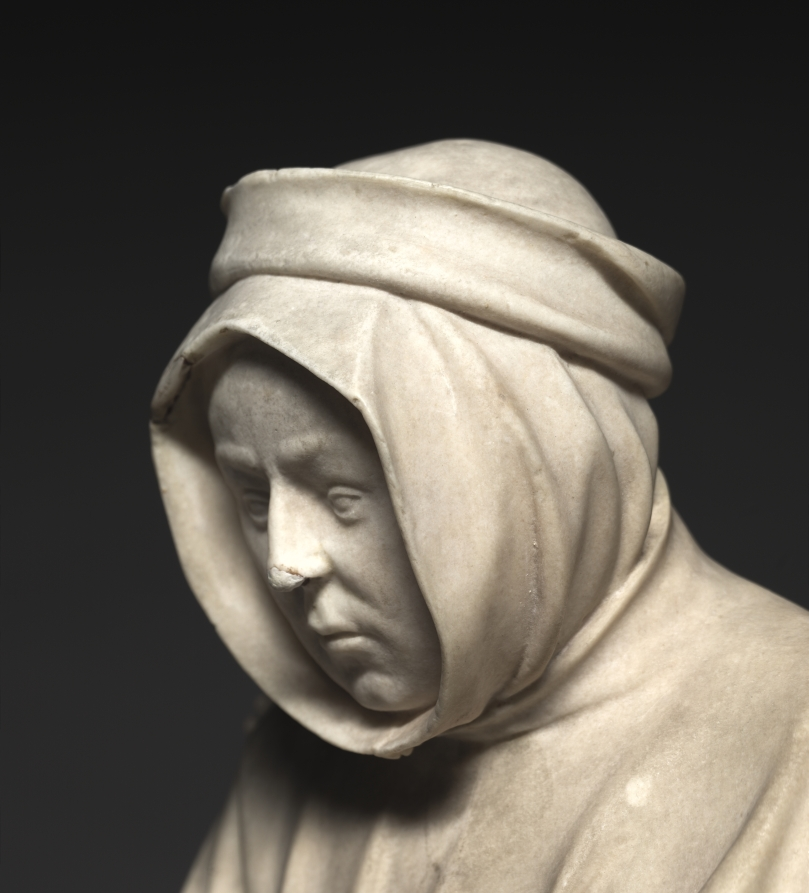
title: Mourner from the Tomb of Philip the Bold, Duke of Burgundy (1364–1404)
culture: Netherlands, active Dijon, 15th century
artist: Claus de Werve (Netherlandish, 1380–1439)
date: 1404–1410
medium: vizille alabaster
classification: Sculpture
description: This figure comes from the tomb of Duke Philip the Bold from the church of Champmol near Dijon (Burgundy, France). Philip, who founded the monastery and designated it as his burial place, hired the best artists, many of whom came from the Netherlands. While the commission was given in 1381, the work was not completed until 1410, six years after the duke’s death. This mourner is unusual for the time because it is not carved as a static low relief on the pedestal of the tomb but interacts with the viewers and their fellow procession members. The lifelike quality of the figure is due in large part to the alabaster. Its softness allowed artists to carve details into the material, and the transparent, milky white stone could also be polished to a high gloss.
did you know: During his life, Duke Philip founded the monastery of Chartreuse de Champmol to serve as a final resting place for himself and his family.